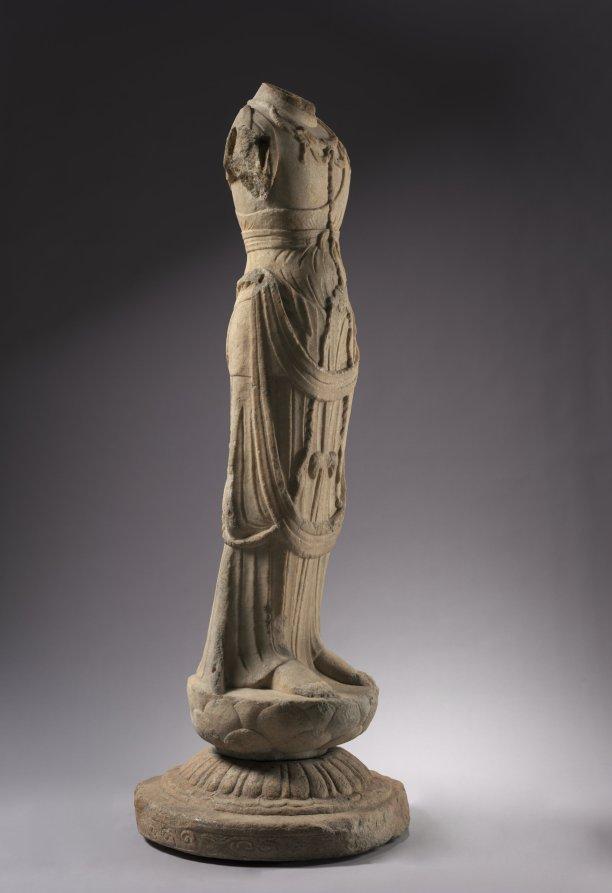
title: Bodhisattva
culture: China, Hebei province, Tang dynasty (618-907)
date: 700s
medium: white marble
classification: Sculpture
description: The bodhisattva is an enlightened being dedicated to the spiritual awakening of all beings. This white marble torso exemplifies the quest for refinement and plasticity of form that mark the golden era of Tang Chinese Buddhist sculpture. The statue was conceived with great power and grandeur. The slight sway of the hip on one side and upraised shoulder on the other result in an elegant S-curve. Emphatic lines cut into the stone create a sense of rhythm and reveal the sculptor’s skill and sureness of execution.